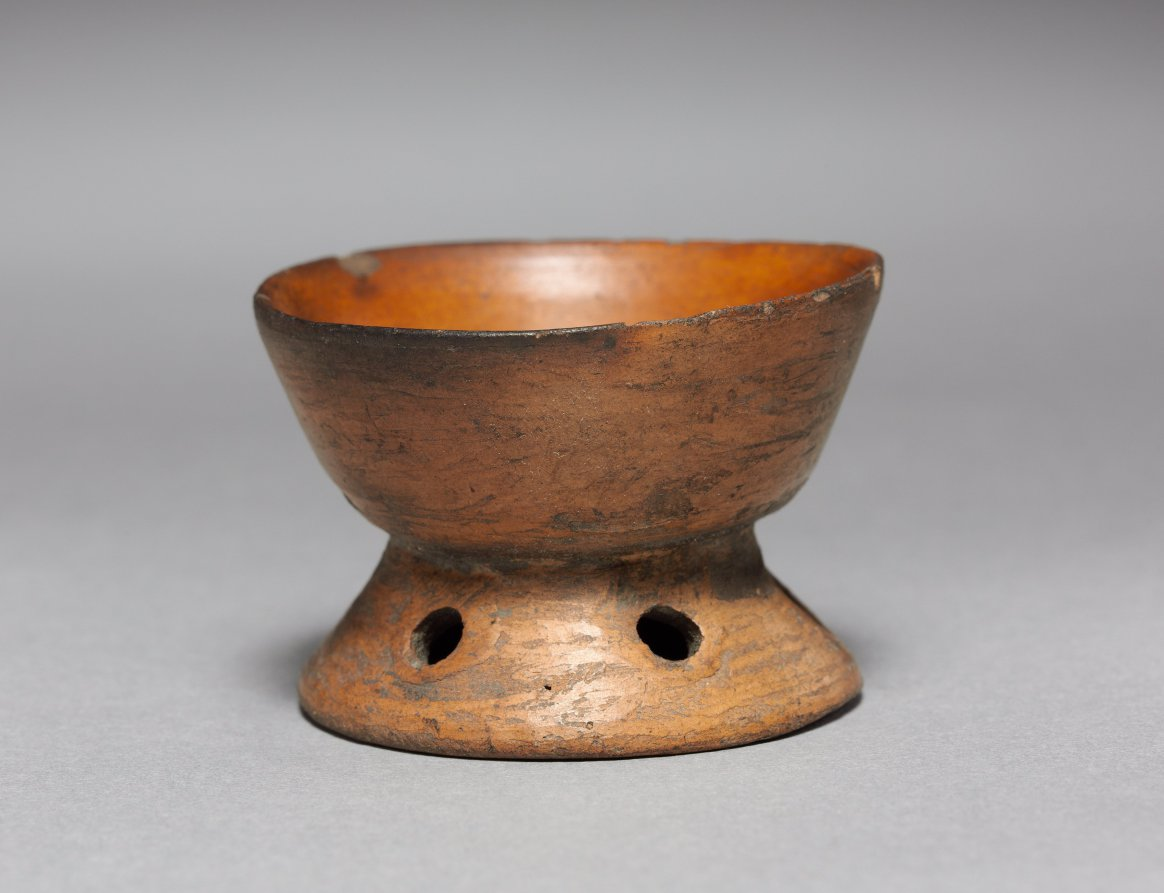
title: Dish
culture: Mexico, 16th century or earlier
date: before 1521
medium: terracotta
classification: Ceramic